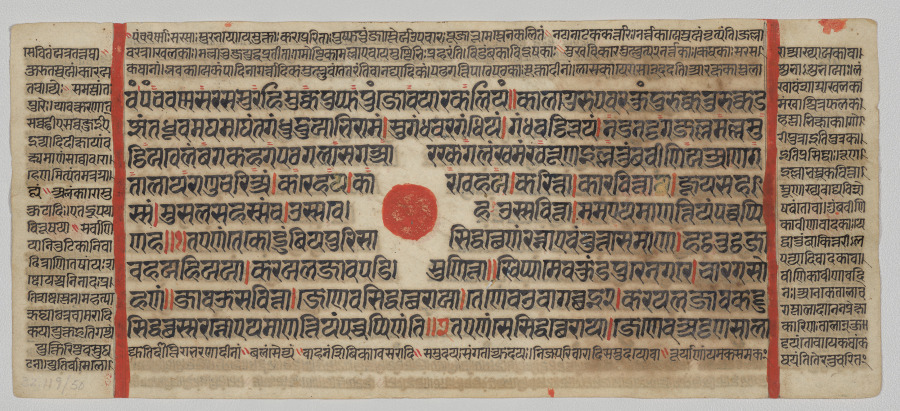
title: Text, Folio 32 (recto), from a Kalpa-sutra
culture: Western India, Gujarat, last quarter of the 15th century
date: c. 1475–1500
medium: Gum tempera, ink, and gold on paper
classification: Painting